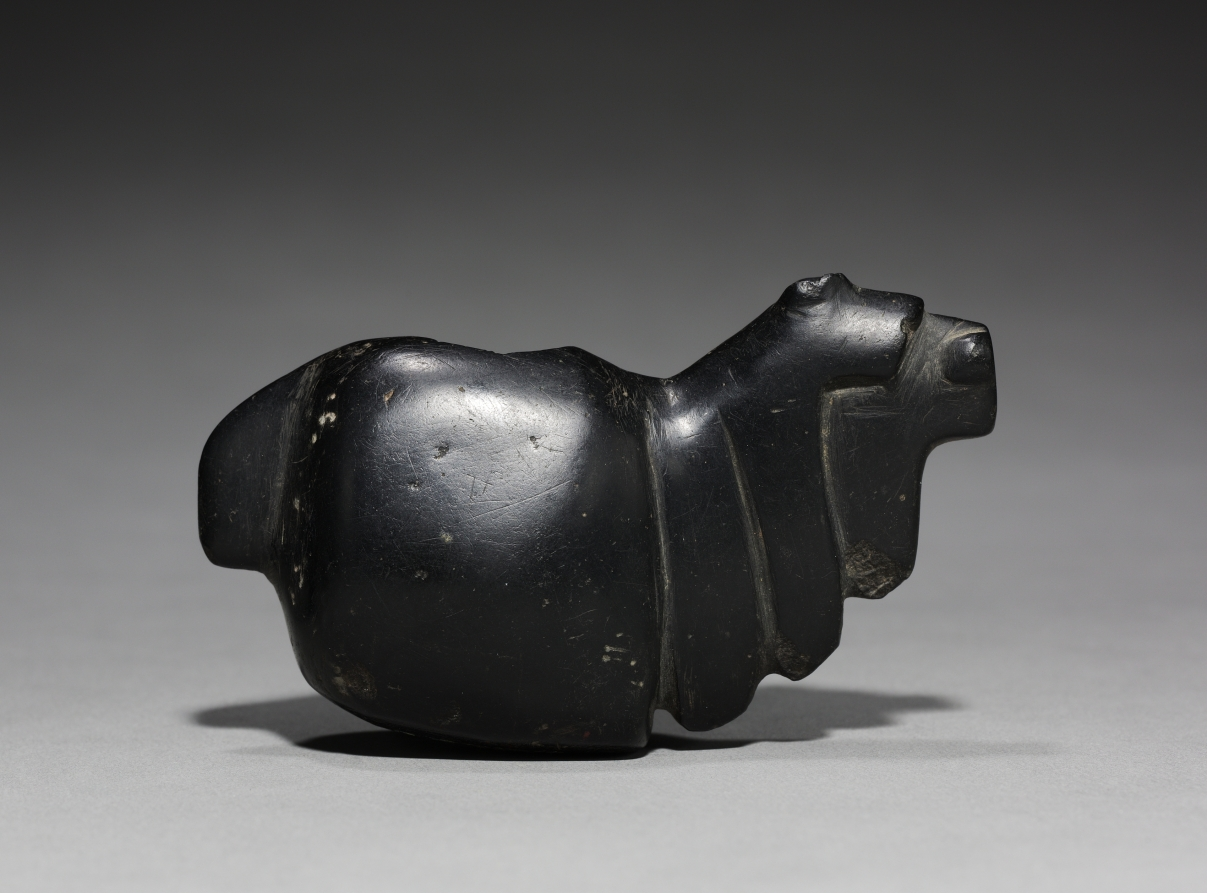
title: Alpaca Offering Container (Canopa)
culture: Peru, Inka style (1400-1532)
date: 1400–1532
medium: stone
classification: Stone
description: An unknown substance was placed in the back cavity of this alpaca before it was buried as an offering.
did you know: This stone llama was an offering buried to ensure health and fertility for domestic animals.